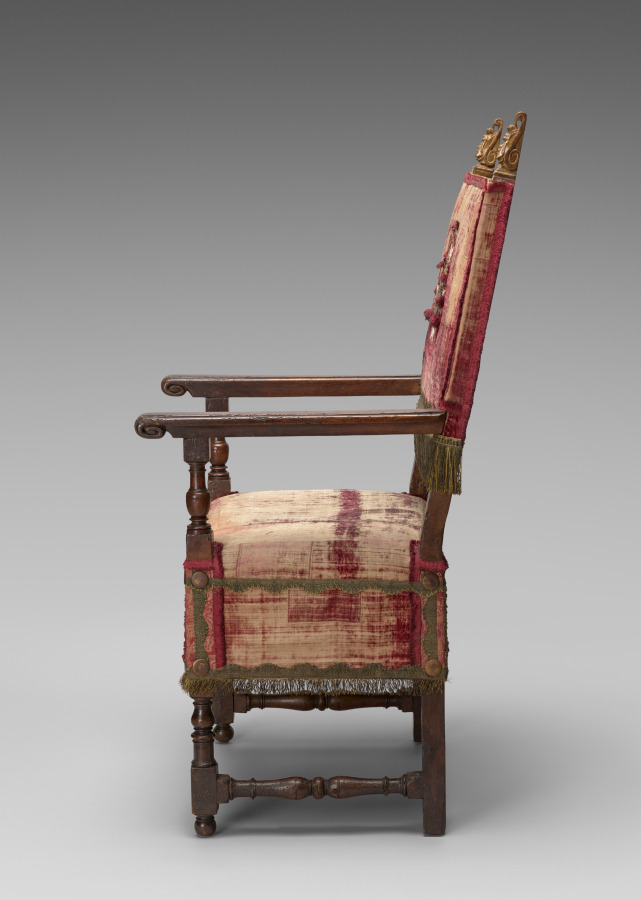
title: Armchair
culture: Italy, 17th century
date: 1600s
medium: walnut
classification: Furniture and woodwork